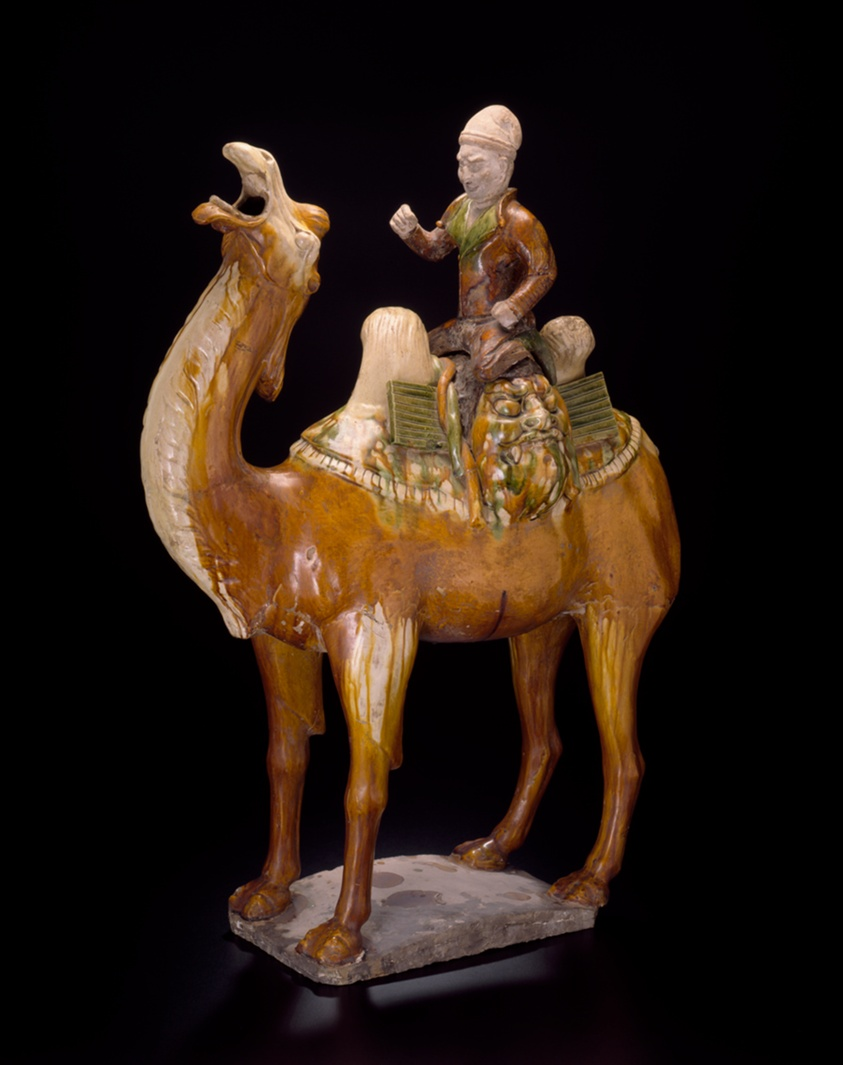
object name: Sculpture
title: Camel and Rider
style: Chinese (culture or style)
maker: China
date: Tang dynasty (618–907), first half of 8th century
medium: Earthenware with three-color (sancai) lead glazes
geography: China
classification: earthenware; asian art; ceramics; sculpture